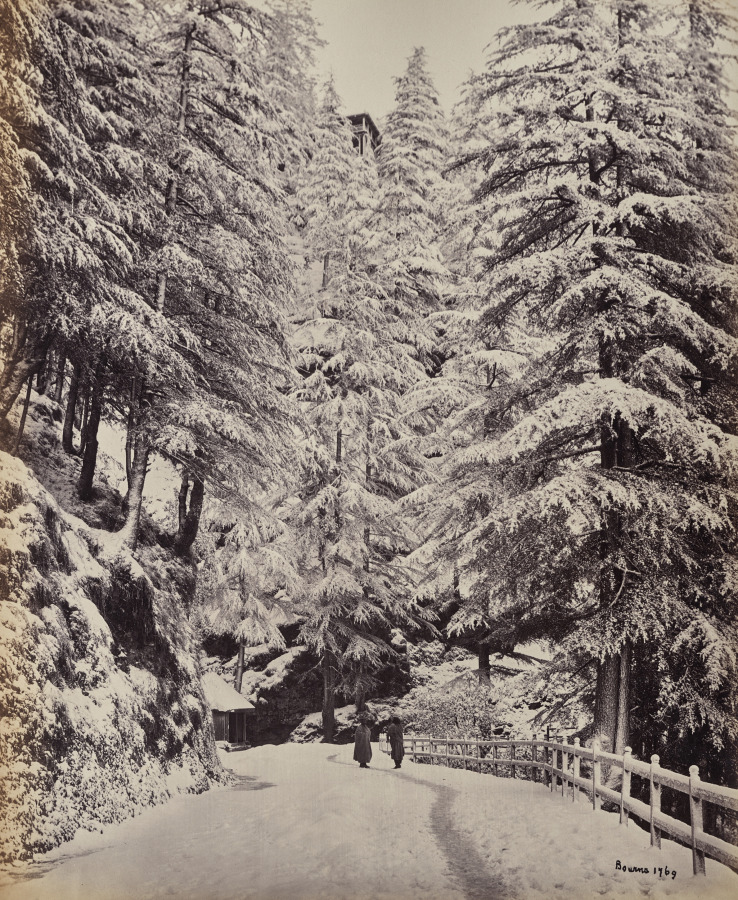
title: Shimla. View on the Mall in Winter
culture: England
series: Photographs of Northern India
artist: Samuel Bourne (British, 1834–1912)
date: 1863–70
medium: albumen print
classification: Photograph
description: The 50 images in this album, all taken in the 1860s, move from the hill towns of the Himalayas down to cities including Lahore (now in Pakistan), Delhi, Lucknow, Agra, Benares (now Varansi), and Calcutta (now Kolkata). Architectural studies of major monuments offer valuable historical records of what sites such as the Taj Mahal and the imperial mosque of the Mughal emperors in Delhi looked like before 20th-century restorations.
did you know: Samuel Bourne, the author of most the images in this album, was a banker in England before he moved to India to become a professional photographer.